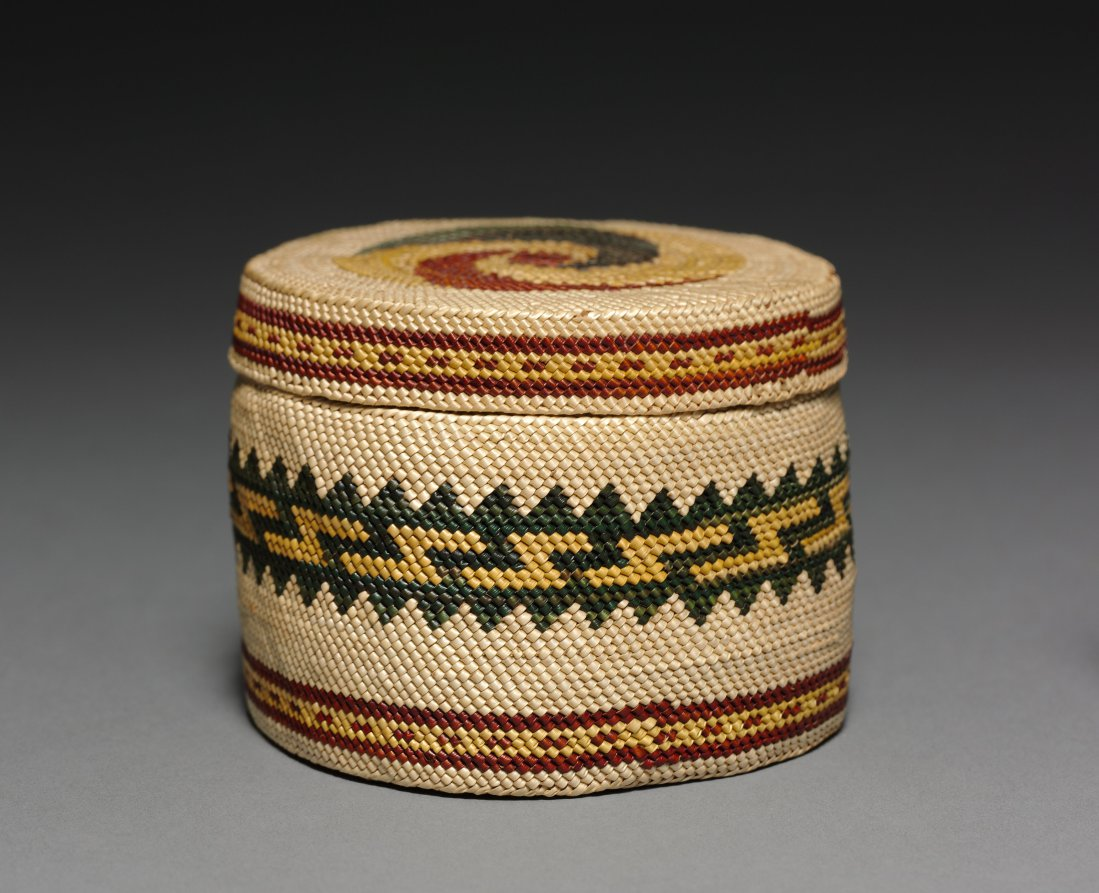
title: Covered Bowl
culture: Northwest Coast, Makah, late 19th-early 20th century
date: c. 1875–1925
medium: twined grasses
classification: Basketry